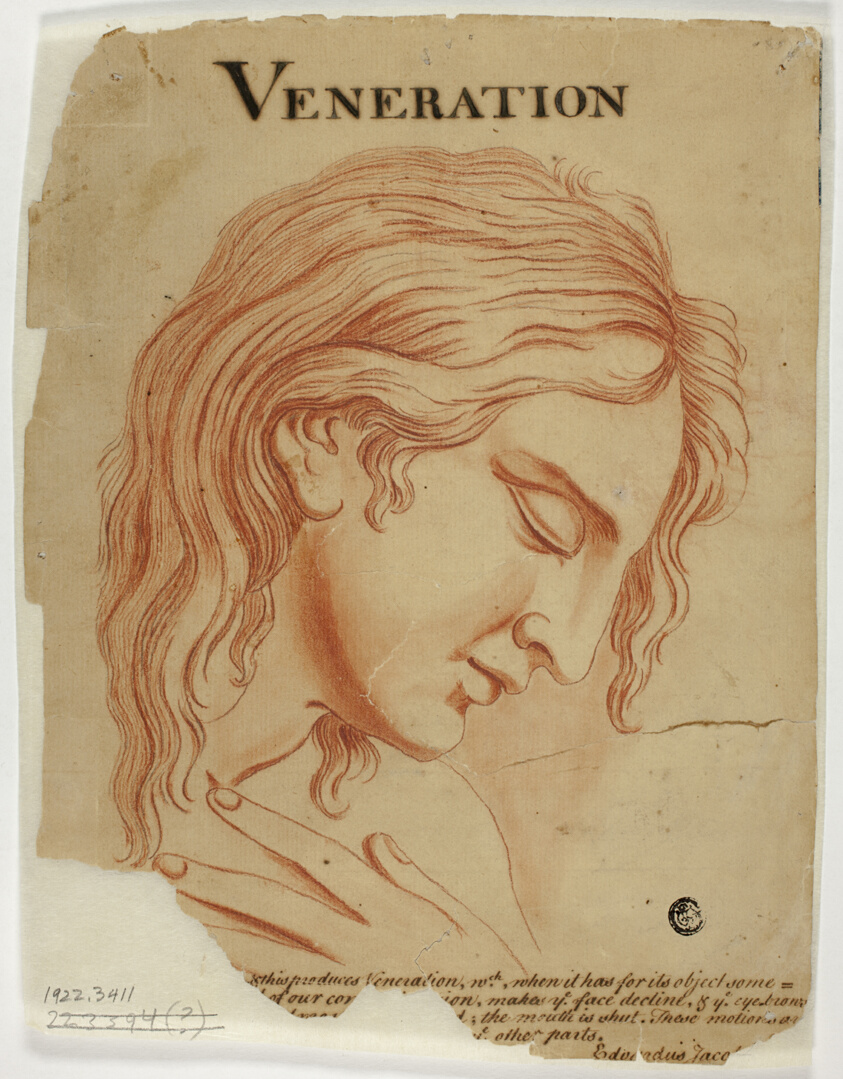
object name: Drawing and Watercolor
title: Veneration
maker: Eduardus Jacobus (British, 18th century); after Charles Le Brun (French, 1619-1690)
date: after 1698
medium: Red chalk, with touches of graphite, on tan laid paper, laid down on ivory Japanese paper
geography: United Kingdom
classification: chalk; drawings (visual works); prints and drawing